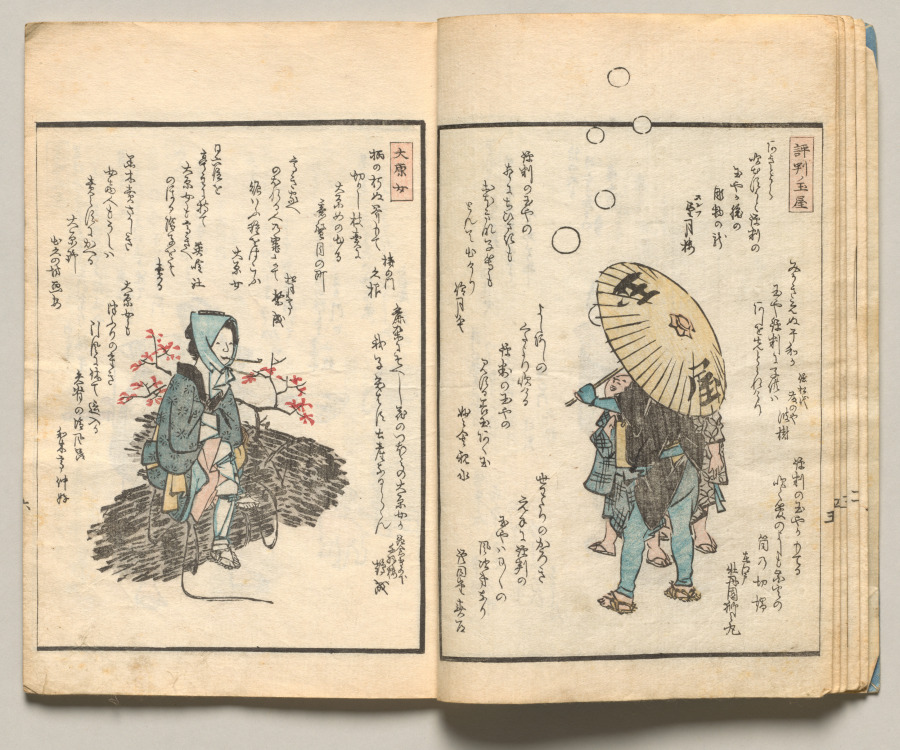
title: Spread Six from Volume Three of People of Japan in Light Verse (Kyōka)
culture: Japan, Edo period (1615–1868)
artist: Utagawa Hiroshige (Japanese, 1797–1858)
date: 1857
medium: Woodblock-printed book; ink and color on paper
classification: Bound Volume